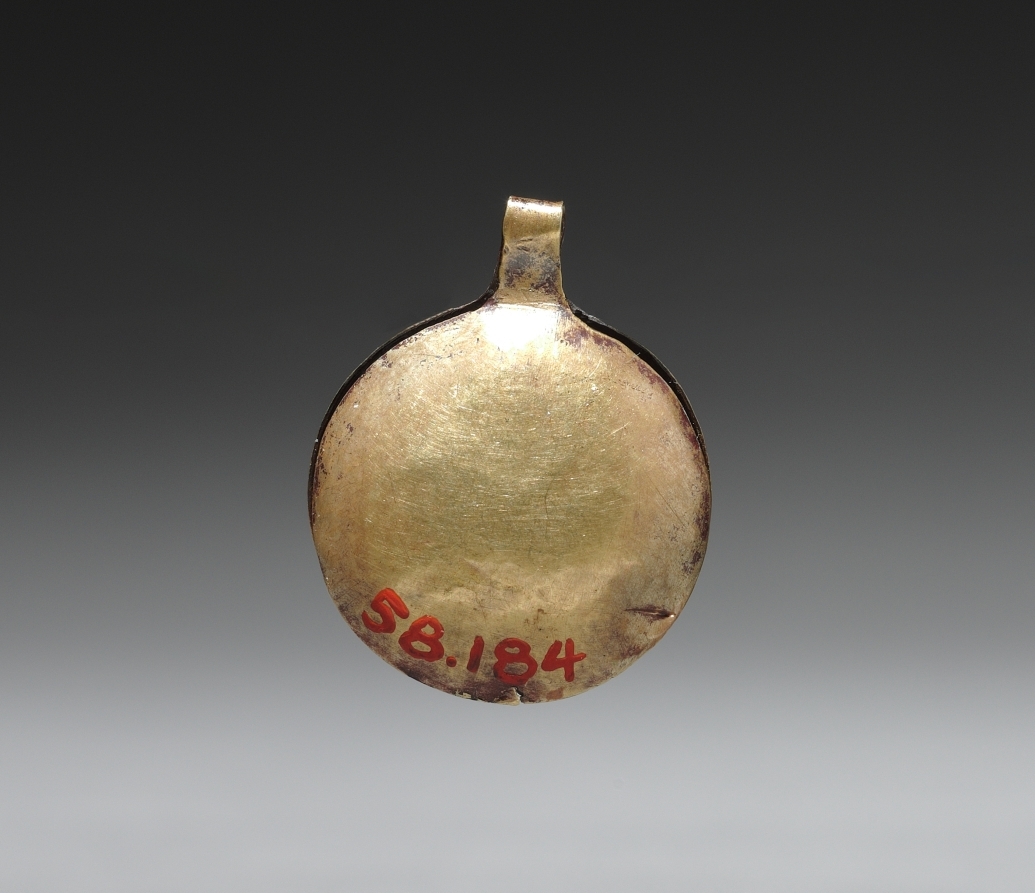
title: Tweezer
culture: Peru, North Highlands, Chavín de Huantar(?), Chavín style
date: c. 500–200 BCE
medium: hammered and cut gold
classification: Metalwork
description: There seems to be a link between Chavín religion and appearance of the Andes’ first large precious-metal objects, made using revolutionary new metallurgical processes. Chavín may have developed these technical innovations to express the inexpressible, the "wholly other" nature of its religion. In many areas, elite men and women wore the ornaments as emblems of their ties to this religion, and eventually were buried with them. These 16 objects, along with three others not in the museum’s collection, are said to have come as a group from Chavín itself.